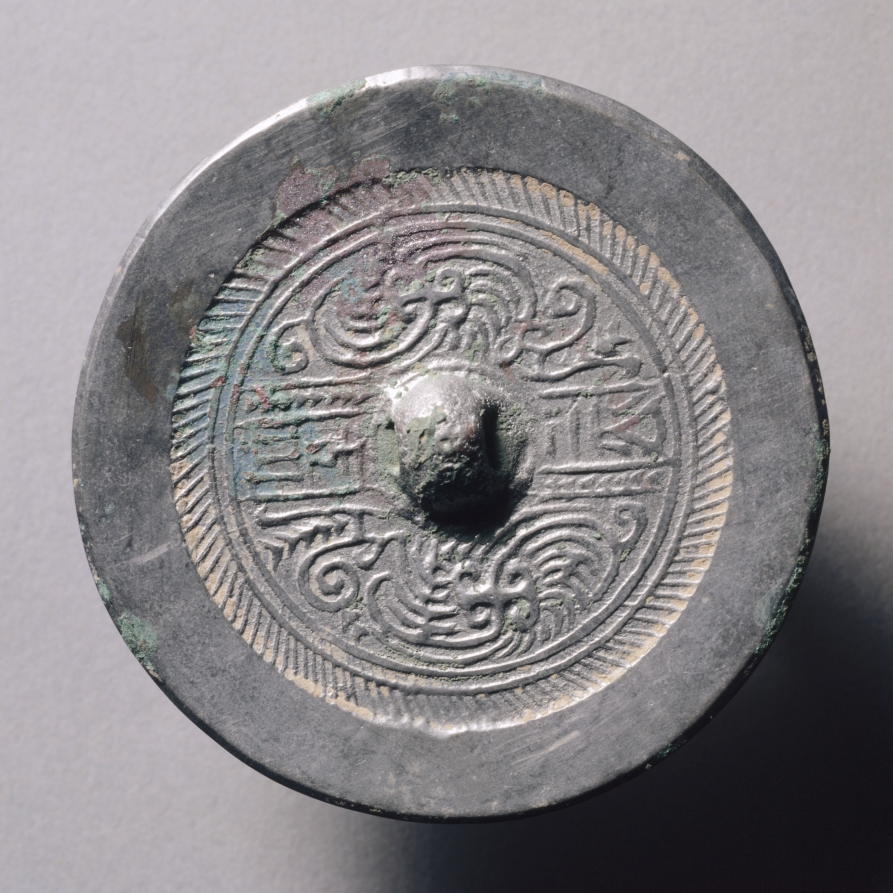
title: Mirror with Quatrefoil, Paired Phoenixes, and Auspicious Animals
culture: China, Eastern Han dynasty (25–220 CE)–Western Jin dynasty (265–316)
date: 25–316 CE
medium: bronze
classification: Metalwork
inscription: 位至三公